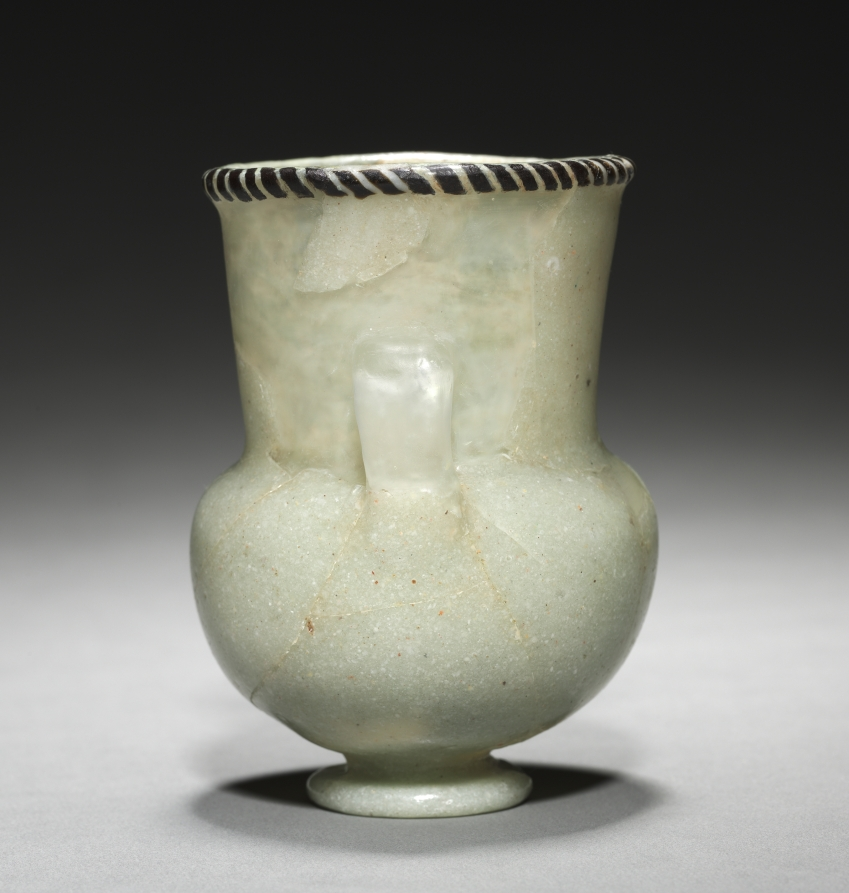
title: Unguent Bottle (Krateriskos)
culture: Egypt, New Kingdom (1540–1069 BCE), Dynasty 18, post-Amarna period or later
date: c. 1336–1295 BCE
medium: glass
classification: Vessels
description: This was probably the most popular type of Egyptian glass vessel. The milky white to sea green-colored fabric and monochrome decorative scheme are reminiscent of Egyptian alabaster. That the Egyptians would make an association between glass and stone is only natural, as the Egyptian name for glass was inr n(y) wdh or "the flowing stone."